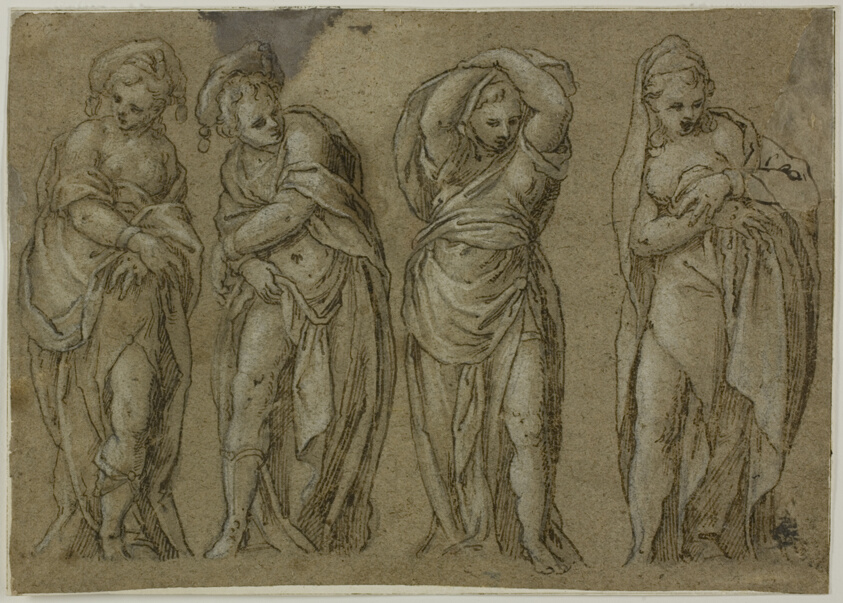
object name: Drawing and Watercolor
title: Four Standing Draped Female Figures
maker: Paolo Farinati or his circle; Italian, 1524-1606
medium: Pen and brown ink, heightened with lead white (partially oxidized), on gray laid paper, laid down on ivory laid paper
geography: Italy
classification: pen and ink drawings; drawings (visual works); prints and drawing